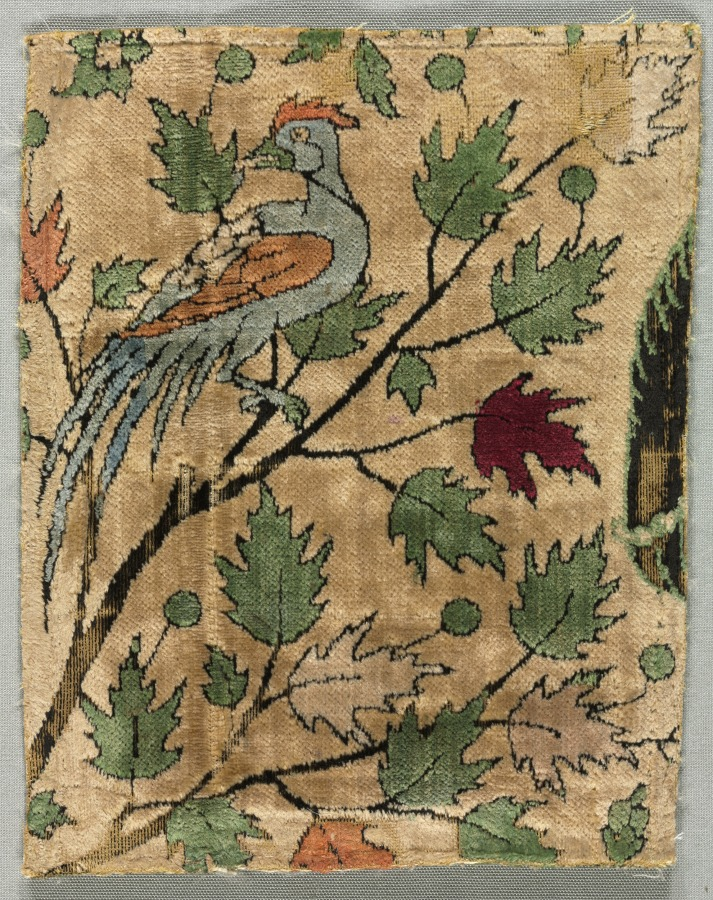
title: Khusrau Surprising Shirin While Bathing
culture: Iran, Kashan, Safavid period (1501-1722)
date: 1550–99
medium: Silk: velvet, pile-warp substitution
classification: Velvet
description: These velvet fragments depict an episode from the Khamsa (Quintet) of Nizami (1141–1209), in which the lovers Khusrau and Shirin first see each other. A pre-Islamic king of Iran, Khusrau has fallen in love with Shirin after seeing her portrait and is traveling to meet her when he happens across her bathing in a stream. Not yet realizing that she is Shirin, Khusrau is transfixed by the woman’s beauty and covets both her and her magnificent black horse. The horse’s mane is just visible here, and she has placed her crown and tunic atop a branch.